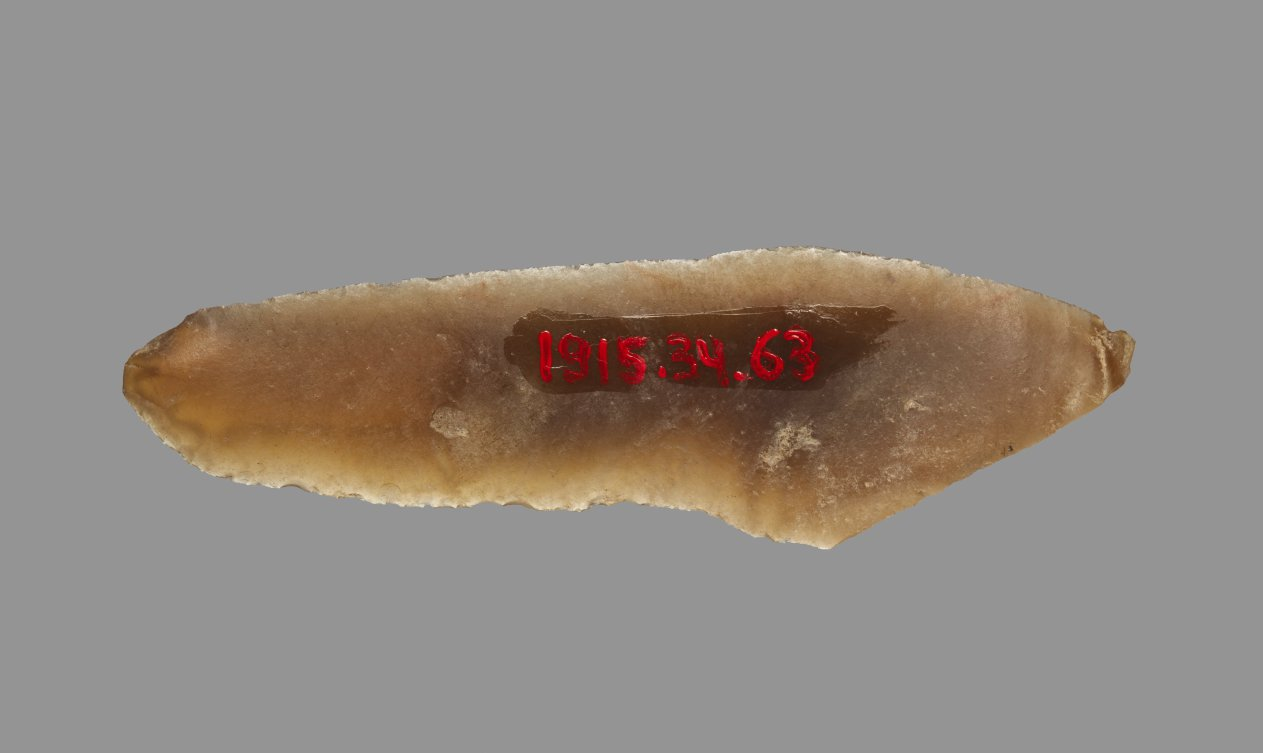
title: Sickle Blade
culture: Egypt, Middle Kingdom (2040–1648 BCE), Dynasty 12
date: 1980–1801 BCE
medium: flint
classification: Implements